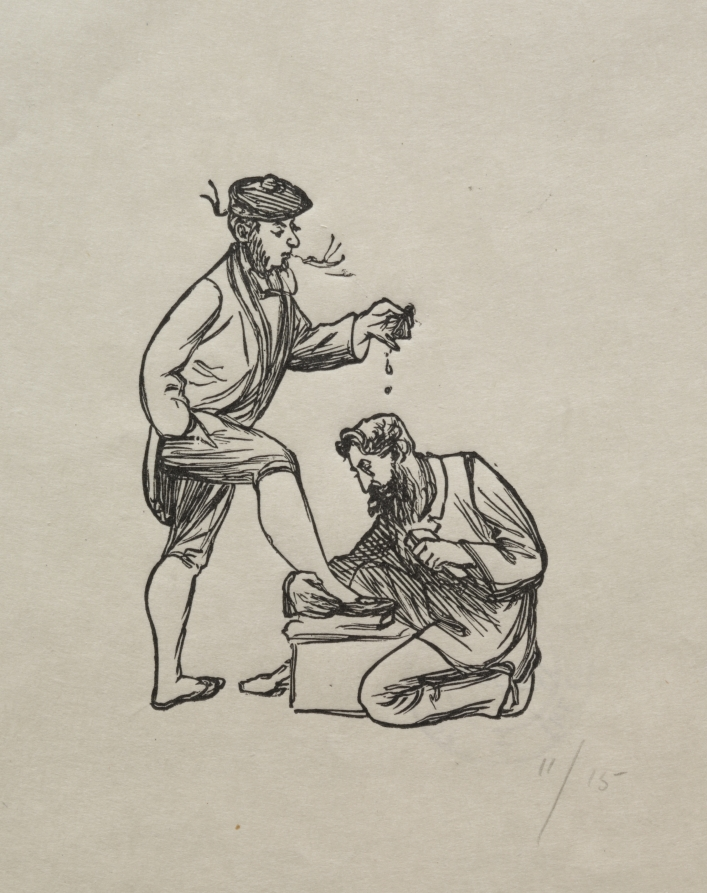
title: Domestic Philosophy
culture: England, 19th century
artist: George Louis Palmella Busson Du Maurier (British, 1834–1896)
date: 1863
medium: wood engraving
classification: Print